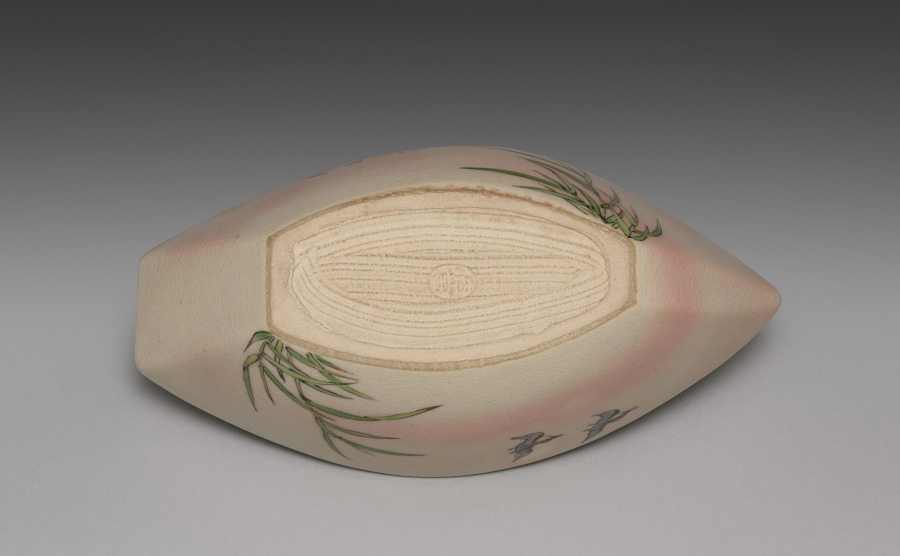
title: Boat-Shaped Bowl with Plovers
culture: Japan, Meiji period (1868–1912)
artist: Seifū Yohei III (Japanese, 1851–1914)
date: 1893–97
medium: Stoneware with crackled glaze and overglaze color enamel and gold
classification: Ceramic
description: Overglaze color enamels create a seascape made complete by the bowl’s boat shape. The bowl’s form inserts a human presence into the scene, much in the way rusu mōyō is used in paintings to suggest people just out of view. Rusu mōyō is a pictorial device by which the presence of someone physically absent from an image is conveyed through the depiction of clothing or other items. The inside of the bowl has a scene of plovers flying through the sky over a profusion of seaweed in sand below. In addition to the black, gray, and green of the overglaze elements, warm pink banding and mottling in the clay come through the glaze and are remarkably effective at suggesting the seashore.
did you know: On the outside of the bowl, on each side, birds fly about grasses in search of a meal.